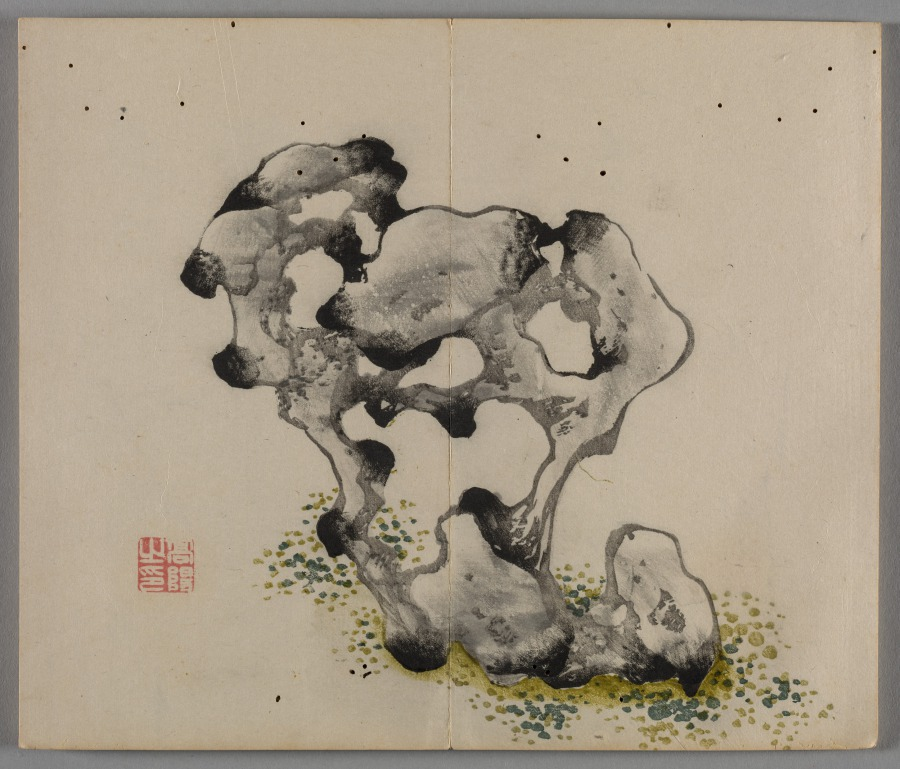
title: Ten Bamboo Studio Painting and Calligraphy Handbook (Shizhuzhai shuhua pu): Rocks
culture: China, Qing dynasty (1644-1911)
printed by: Hu Zhengyan (Chinese, c. 1584–1674)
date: 1633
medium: Woodblock-printed book; ink and colors on paper; first edition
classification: Print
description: Color printing reached a level of perfection in the early 1600s, as seen in this Ten Bamboo Studio Collection of Calligraphy and Painting and the Mustard Seed Garden Manual of Painting (printed 1679 and 1701). The painterly quality, precision in registering (aligning) the woodblocks, and harmonious colors made them the most successful color print editions in Chinese history. Both editions were printed and compiled in Nanjing, spread nationwide, and had a great impact on the arts in Japan and Korea.